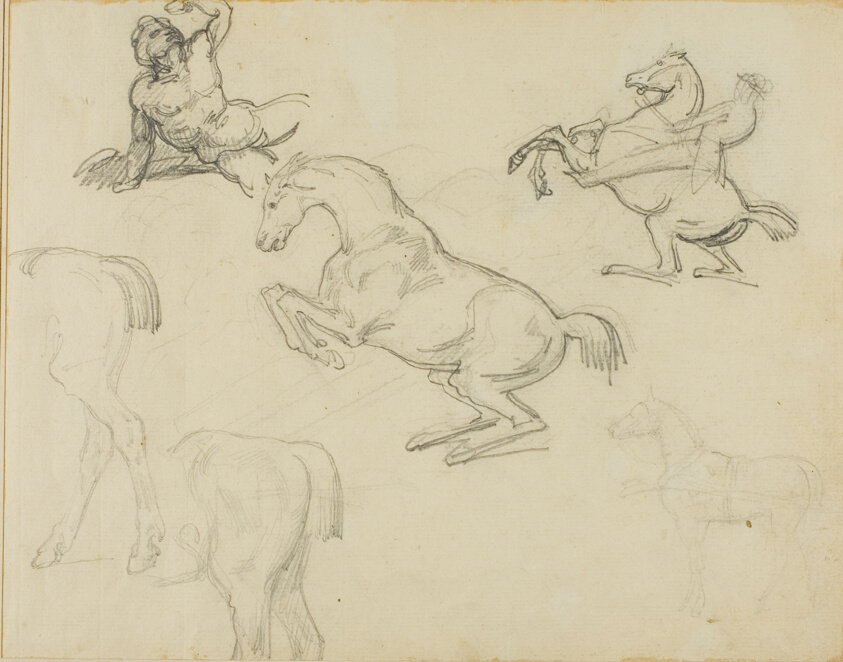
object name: Drawing and Watercolor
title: Sketches: Reclining Nude, a Horseman and Various Horses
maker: Jean Louis André Théodore Géricault (French, 1791-1824)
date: 1818/1819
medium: Graphite, on cream laid paper, perimeter mounted on cream wove paper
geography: France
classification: graphite; drawings (visual works); prints and drawing